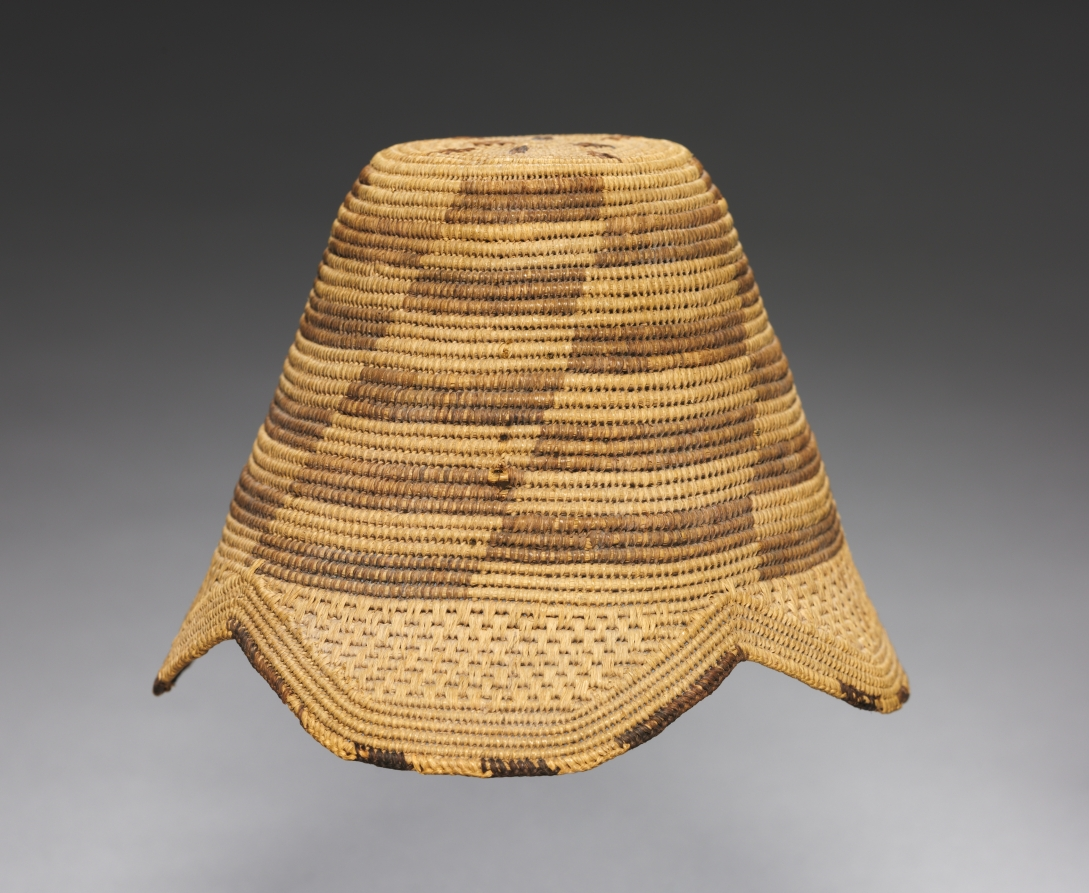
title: Hat (laket) with Pin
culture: Africa, Central Africa, Democratic Republic of the Congo, Kuba-style maker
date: Early 1900s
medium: Raffia, dye, and metal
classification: Garment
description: Titled Kuba men and prominent women wear the laket, a small ornate dome-shaped hat. An essential fashion item of adult men in good social standing, it focuses special attention on the head as a significant marker of individual identity, ethnic affiliation, status, and role in society. This prestige object is secured on the crown of the head with a nine-and-a-half-inch metal pin that pierces through the hat onto a clump of hair. The laket is made from raffia palm fiber coiled into threads and woven in two alternating patterns and contrasting light and dark (dyed) wefts. There are two examples of the laket: the plain type with the flat top, and the more elaborate type called the laket mishiing.